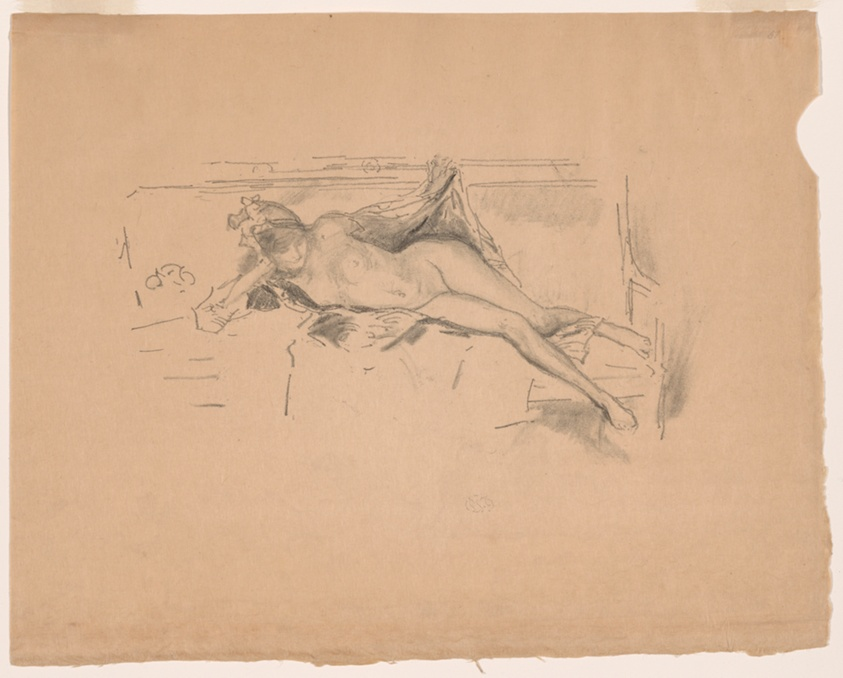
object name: Print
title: Nude Model, Reclining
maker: James McNeill Whistler (American, 1834-1903)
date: 1893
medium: Transfer ithograph in black on tan laid Japanese paper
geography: United States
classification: transfer lithograph; lithograph; paper; print; prints and drawing